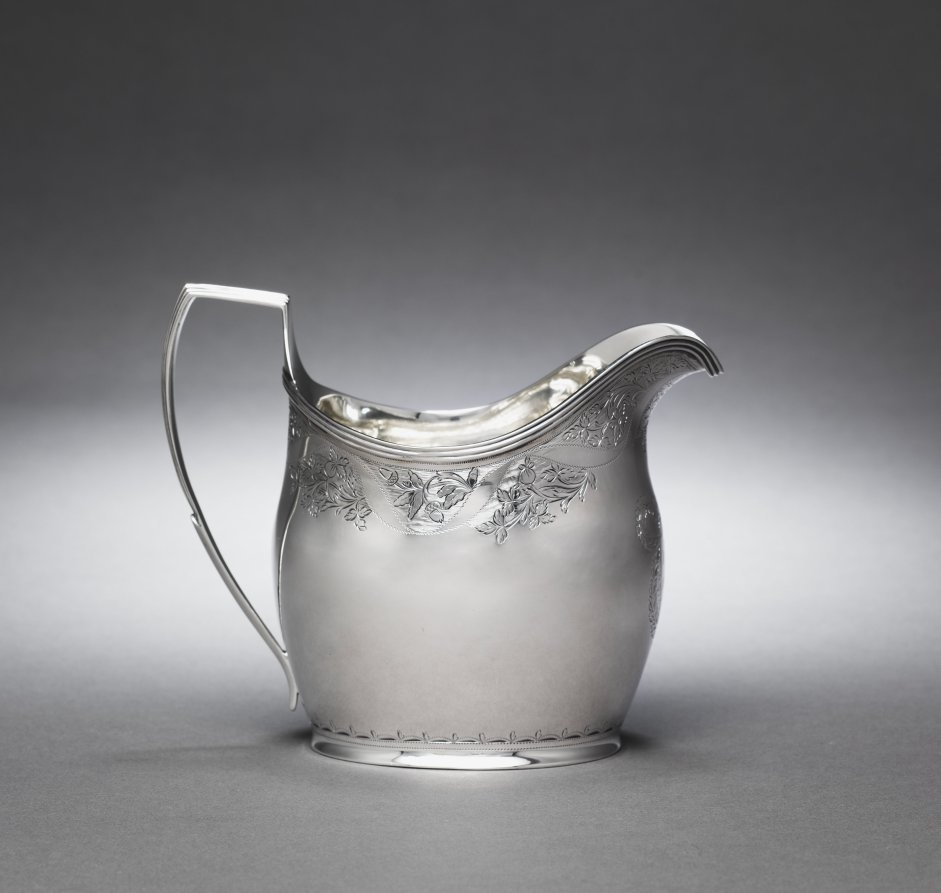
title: Tea Service (Creamer)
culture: London, England, 19th century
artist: Anne Bateman (British, 1748–1813)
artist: Peter Bateman (British, 1740–1825)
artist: William (I) Bateman (British, 1774–1850)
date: 1807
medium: silver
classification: Silver